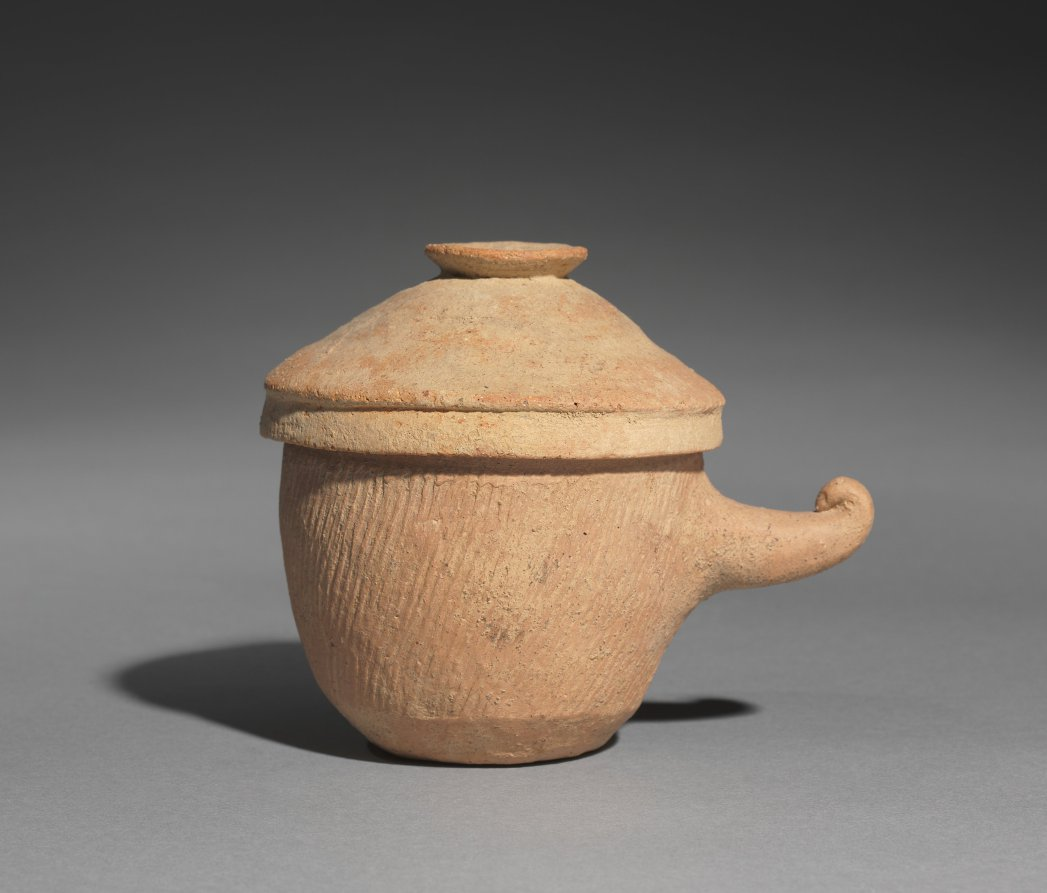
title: Lidded Jar with Horn Handle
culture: Korea, Silla (57 BC-935) or Kaya (AD 42-562) period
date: 400s-500s CE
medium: red earthenware with impressed designs and applied red slip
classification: Ceramic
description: This type of pottery vessel was a product of closed kilns built on hillsides, which became widely used in Korea during the Three Kingdoms period. Its low-fired red surface indicates the various steps in its fabrication. First, coils of clay were layered on top of one another and pinched together to form the wall of the pot. Then wood mallets with carved surfaces pounded these walls simultaneously, inside and out, merging and thinning the clay bands. Thus the impressed designs visible on both the inner and outer surfaces were functional as well as decorative.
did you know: Closed kilns built on hillsides became widely used for producing this type of pottery vessel in Korea during the Three Kingdoms period.